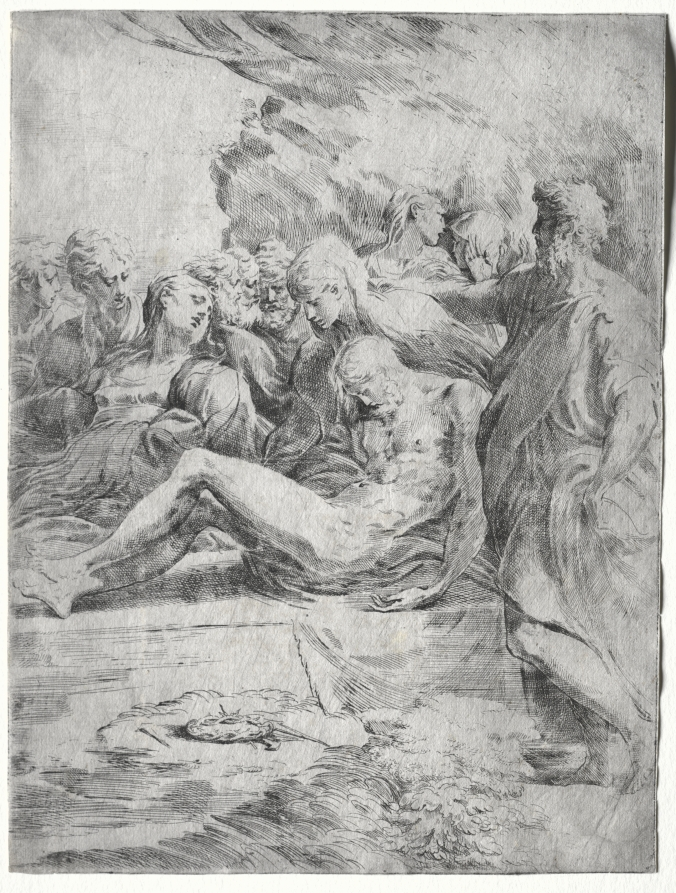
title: The Entombment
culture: Italy, 16th century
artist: Parmigianino (Italian, 1503–1540)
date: 1529–30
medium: etching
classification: Print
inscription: VERSO, lower center, in graphite: 374* /[illegible word]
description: One of the most important Mannerist painters, Parmigianino was the first artist to exploit the fluid, expressive potential of etching. The graphic vocabulary of the day (derived from engraving techniques) consisted of parallel and cross-hatched lines. Etching, a new technique developed around 1510, freed the artist from both the traditional vocabulary of engraving and dependence on reproductive printmakers. Parmigianino used the medium to convey the grace and spontaneity of his pen and ink drawings. Of the twenty etchings attributed to him, this is generally considered his masterpiece.